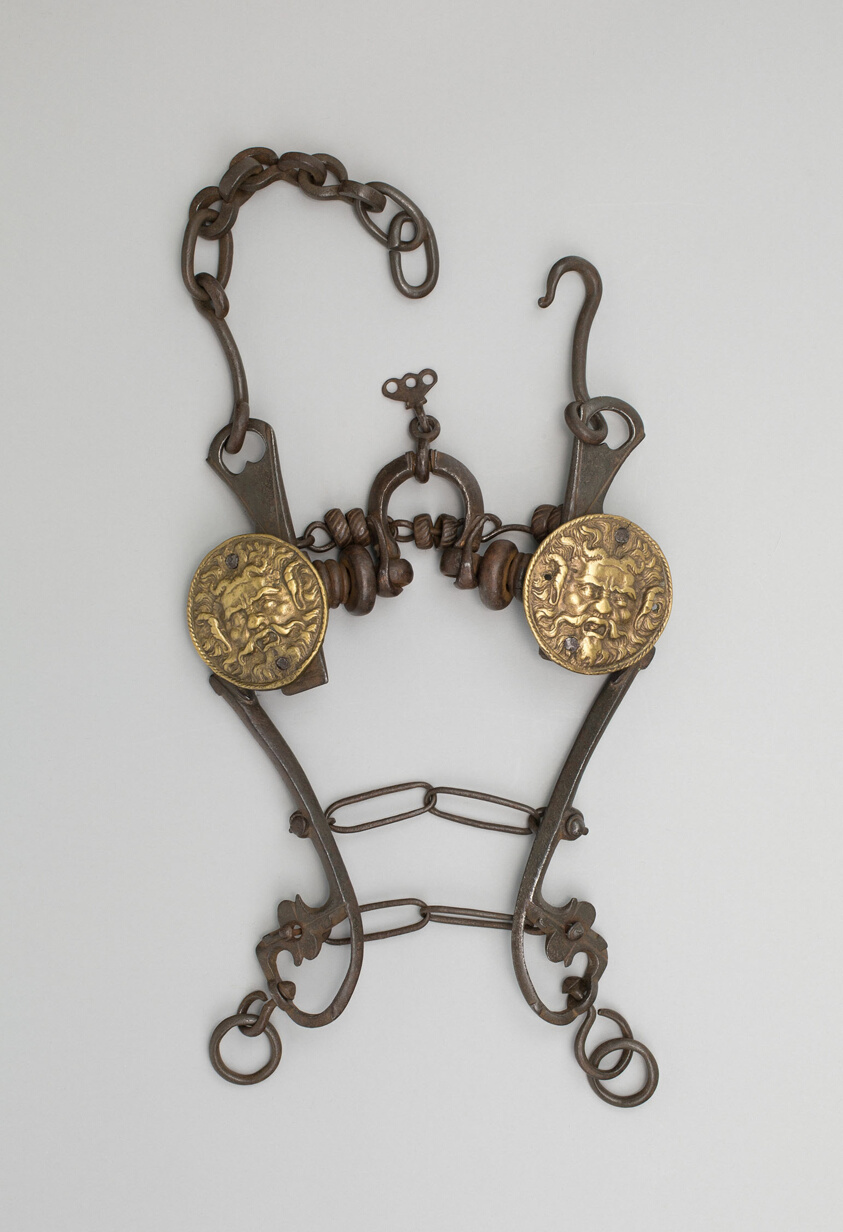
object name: Armor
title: Curb Bit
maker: Italian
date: late 16th century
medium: Iron, steel, and brass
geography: Italy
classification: horse equipment; armor; arms and armor